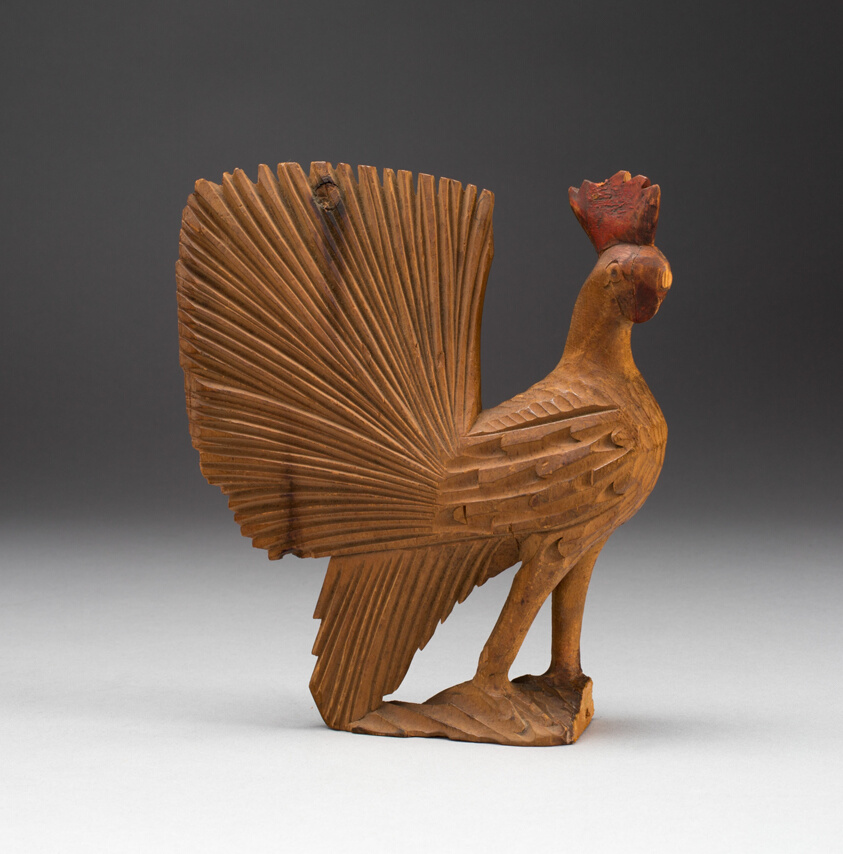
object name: Decorative Arts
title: Rooster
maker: Artist unknown (American, 19th century)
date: 1850–1900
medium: Wood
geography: United States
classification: sculpture; american decorative arts; american arts; decorative arts